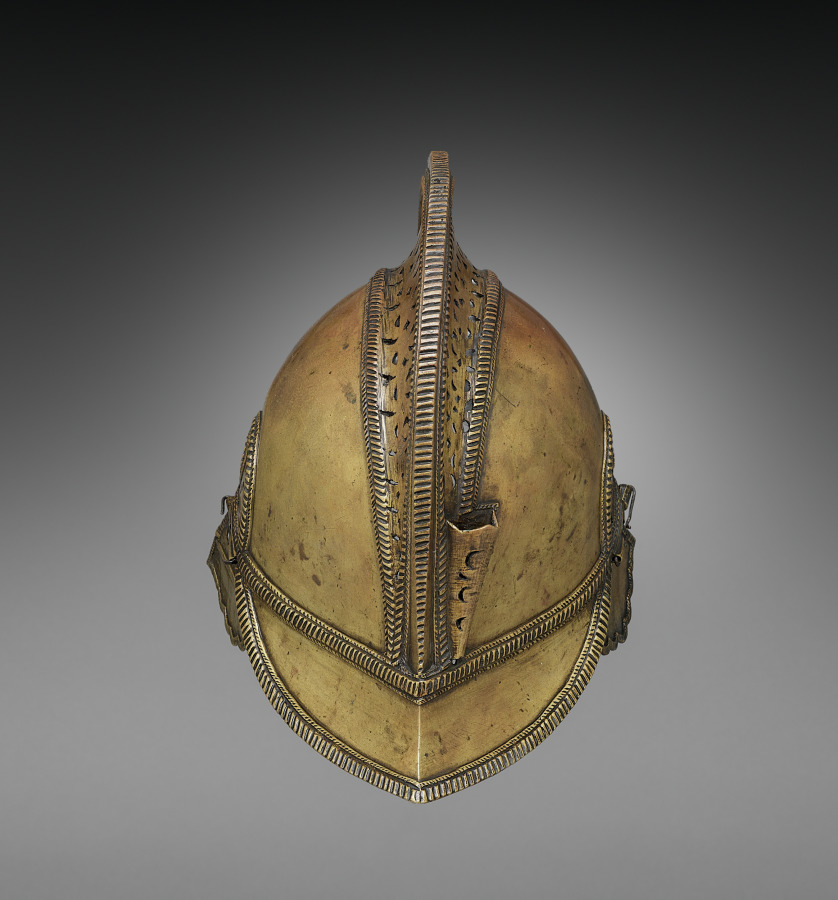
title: Helmet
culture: Philippines, Mindanao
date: 1800s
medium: Brass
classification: Arms and Armor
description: The predominantly Muslim Maranao people of the southern Philippines developed a rich material culture—including brass work, textiles, weaponry, and architecture—commonly featuring a curvilinear, geometric ornament known as okir. This helmet, while based on Spanish types, features filigree vents and openwork embellishment that are distinctively Mindanao. The top might once have been decorated with feathers or other ornaments.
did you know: Bacolod, the traditional homeland of the Maranao people, is a historic pangampong (fortified settlement) on Lake Lanao.